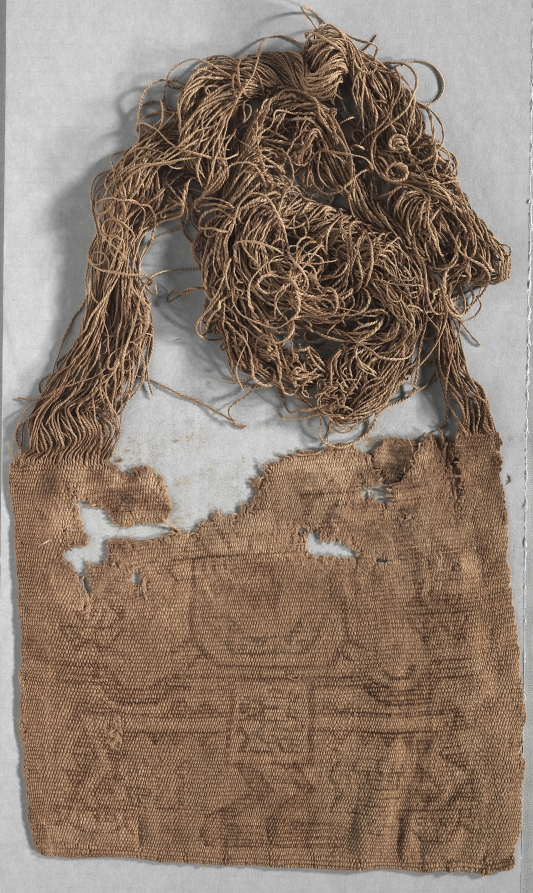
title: Mummy Bundle "Mask"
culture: Peru, South Coast, Ica Valley, Ocucaje site, Paracas style (700 BCE–1 CE)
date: 200 BCE–1 CE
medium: warp-faced cloth, painted: cotton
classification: Textile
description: The Paracas people of Peru's South Coast buried their dead in pear-shaped mummy bundles made of a seated human body carefully wrapped in garments and other textiles. Sometimes a painted cloth was placed at the top of the bundle, as though it served as the bundle's face, head, or "mask." The cloth was padded on the back so it curved outward like a face, and the tress-like yarns (unwoven warps) at the upper edge were arranged around a solid cotton disk that, in turn, was wrapped with a headband. Some cloths were painted with mask-like faces, and others with full figures, apparently mythical creatures.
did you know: These masks fall into two categories, those with only a face and those with a full-bodied figure.